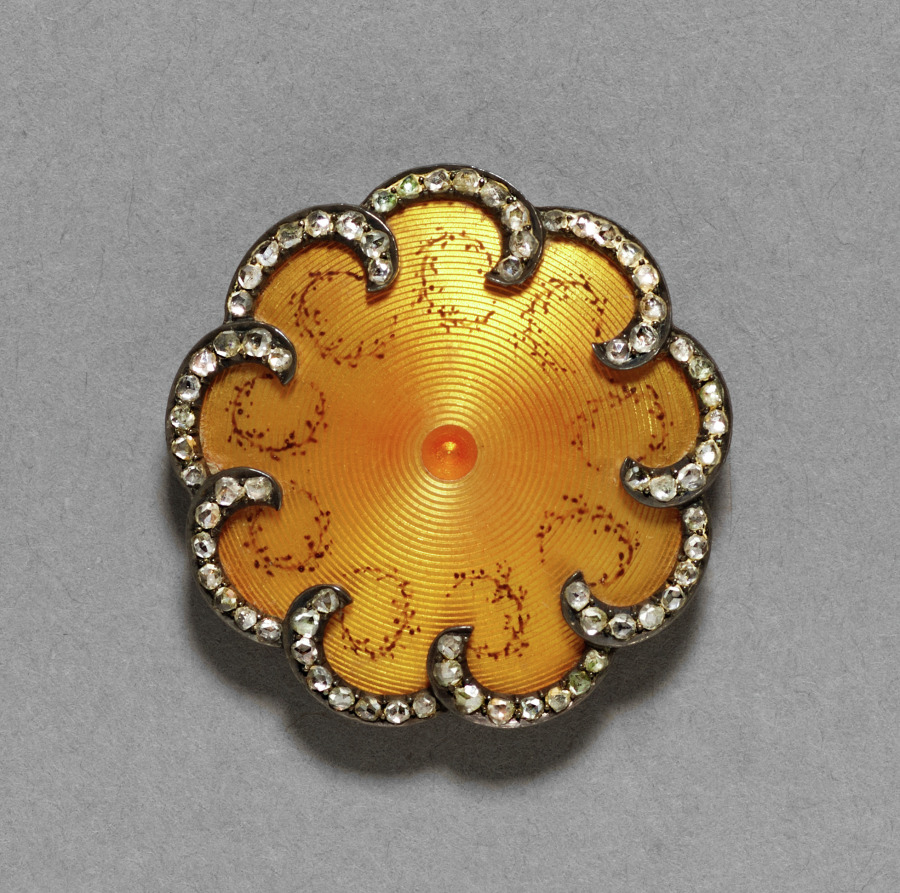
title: Button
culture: Russia, St. Petersburg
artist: firm of Peter Carl Fabergé (Russian, 1846–1920)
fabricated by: August Wilhelm Holmström (Russian, 1929–1903)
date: after 1896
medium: gold, enamel, diamonds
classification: Miscellaneous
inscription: inscribed: double-headed eagle; Fabergé; St. Petersburg, Moscow (all in Cyrillic; inside lid of box).